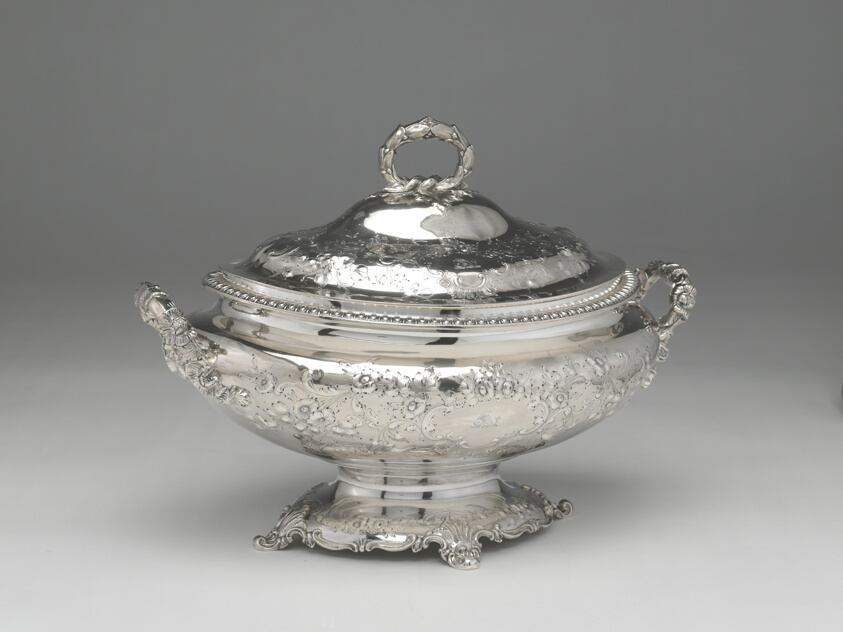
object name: Metalwork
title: Tureen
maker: William Gale and Son; American, 1850–58; 1862–66; New York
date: 1852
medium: Silver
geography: New York City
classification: vessel for serving food; silver; american decorative arts; american arts; decorative arts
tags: dining, drinking